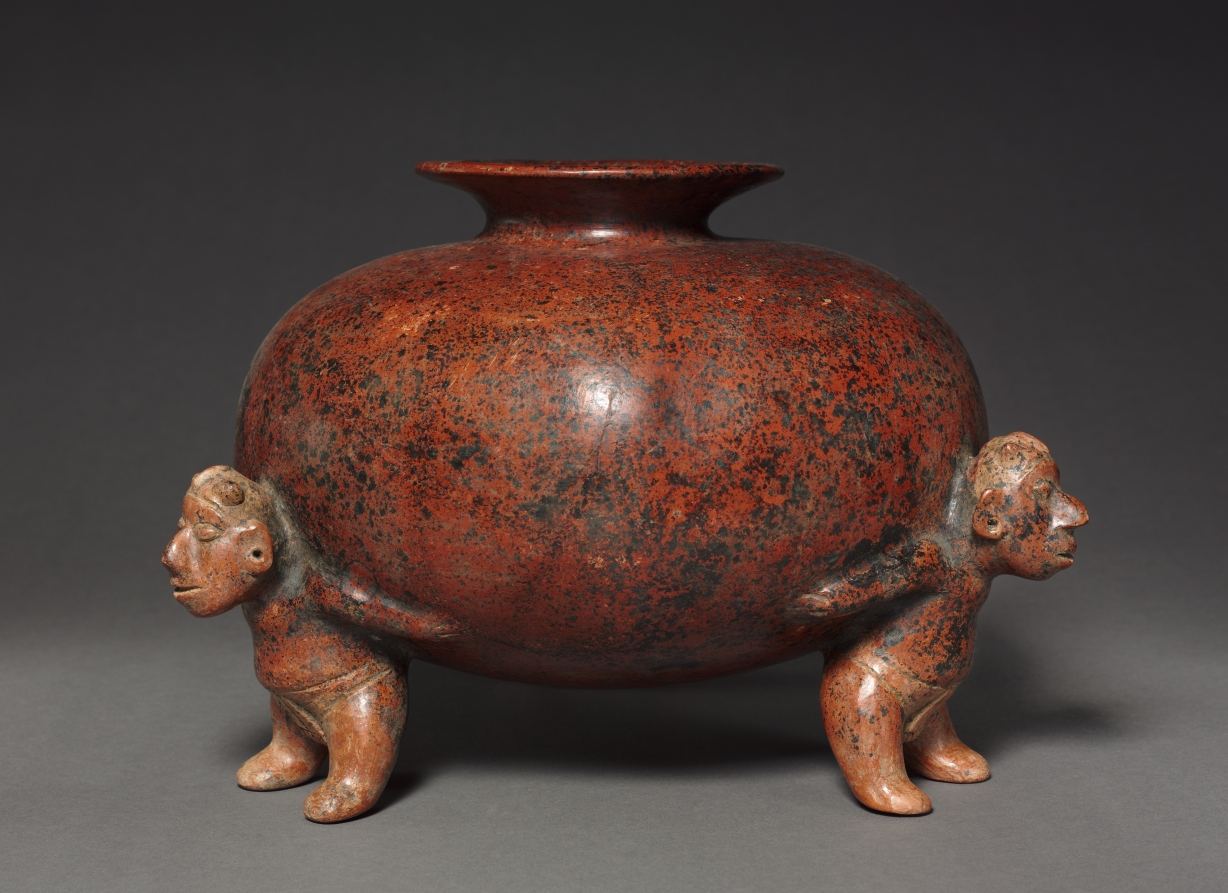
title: Vessel with Crested Atlantean (Supporting) FIgures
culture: West Mexico, Colima, Comala style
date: 200 BCE–300 CE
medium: earthenware with colored slip, black burial deposits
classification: Ceramic